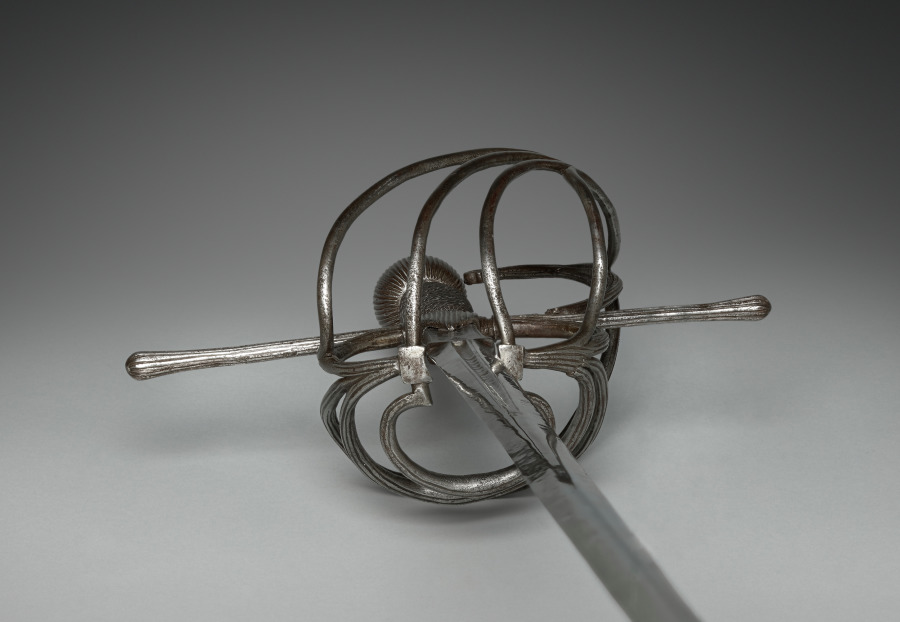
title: Rapier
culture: Blade: Spain, Toledo Hilt: Italt, Belluno?, late 16th-early 17th Century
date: c. 1580–1610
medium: steel, ribbed guard and pommel; wood and wire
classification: Arms and Armor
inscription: PIETRO HERNAN[DJEZ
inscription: three (Toledo and half-moon)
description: The rapier was a sword worn with civilian dress and used in duels. The term rapier derives from the 16th-century French word rapière, which in turn derived from the Spanish espada ropera, or “dress sword.” The rapier was a light weapon with a straight double-edged and pointed blade that, with the development of the art of fencing in the 1500s and 1600s, gradually became narrower and lighter, and thus suitable for thrusts only. With the new technique of swordplay emphasizing the point of the blade, sword guards became more complex to protect the duelist’s unarmored hand. These elaborate guards were frequently decorated by various techniques—chiseling, bluing, russeting, and damascening.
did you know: During this time fencing academies were already in existence in Milan, Venice, Verona, and Madrid, and the rules of fencing evolved with two styles dominating, the Spanish and the Italian.